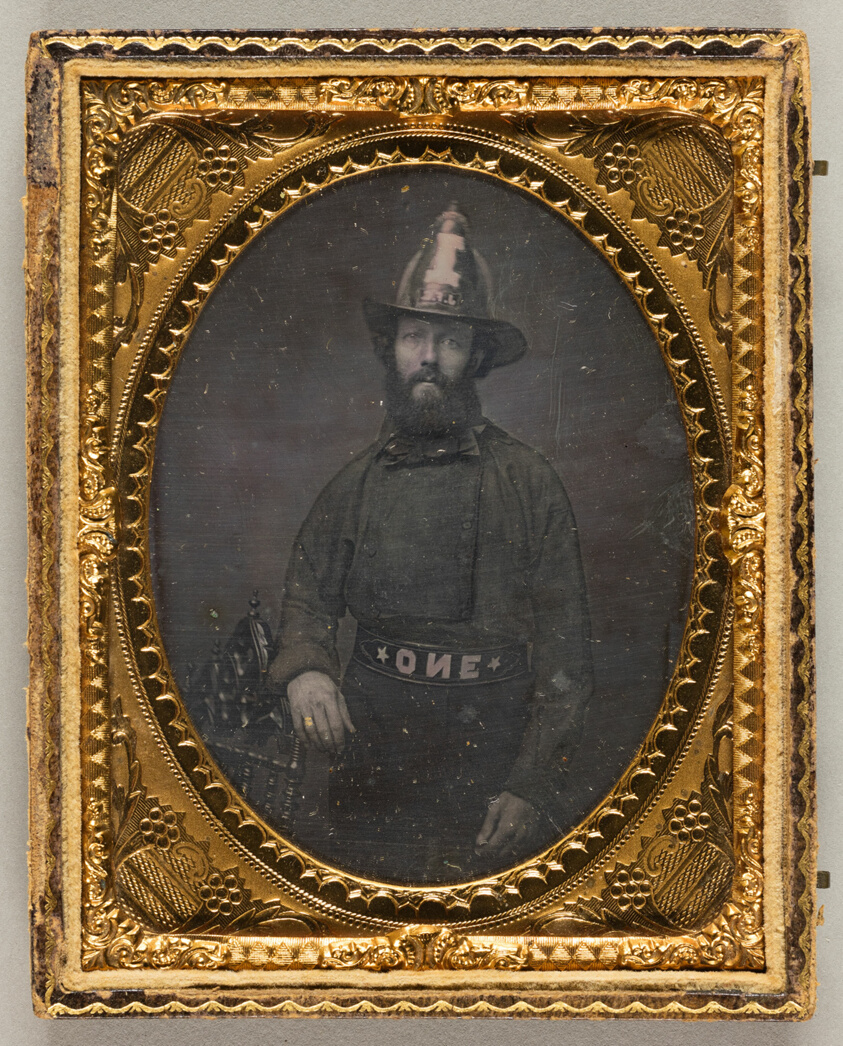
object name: Photograph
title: Fireman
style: 19th century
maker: Photographer unknown; American, 19th century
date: 1850/60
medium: Daguerreotype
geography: United States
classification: photograph; photography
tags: Collected by Hugh Edwards, portraits